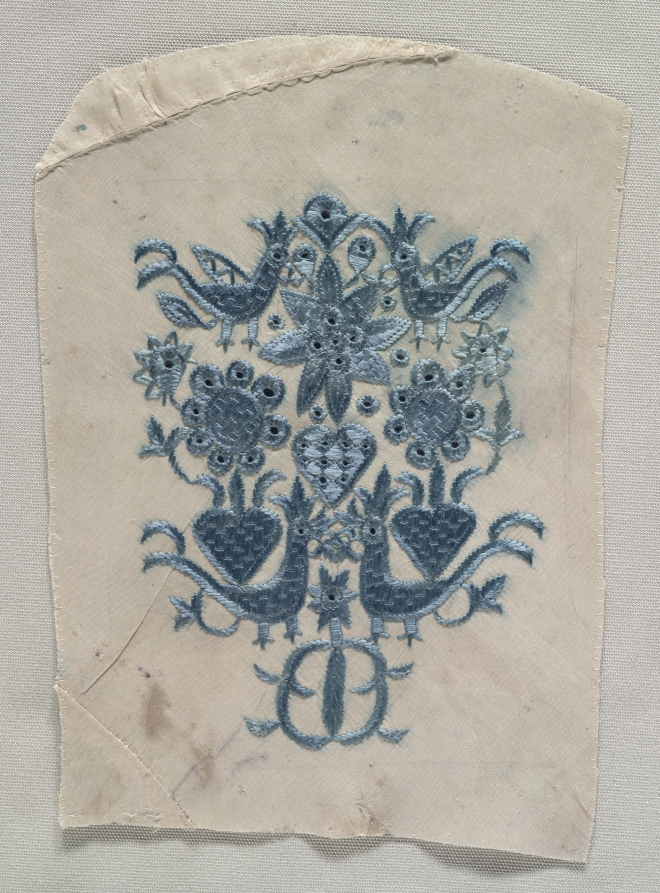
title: Embroidered Fragment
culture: Greece, Crete, 17th-18th century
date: 1600s - 1700s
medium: embroidery; silk on silk tabby ground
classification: Embroidery